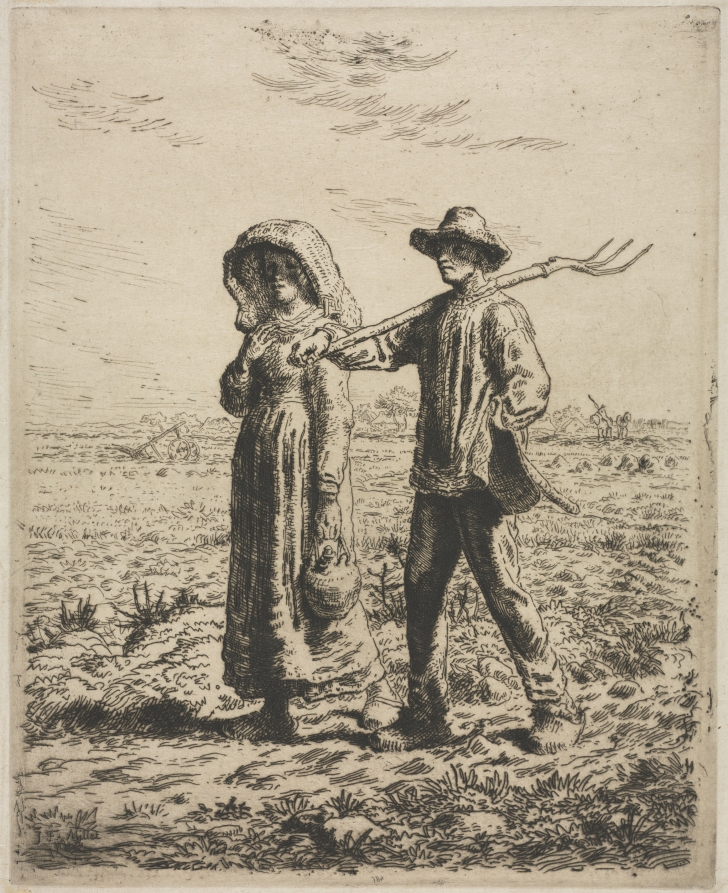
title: Going to work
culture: France, 19th century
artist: Jean-François Millet (French, 1814–1875)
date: 1863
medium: etching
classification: Print